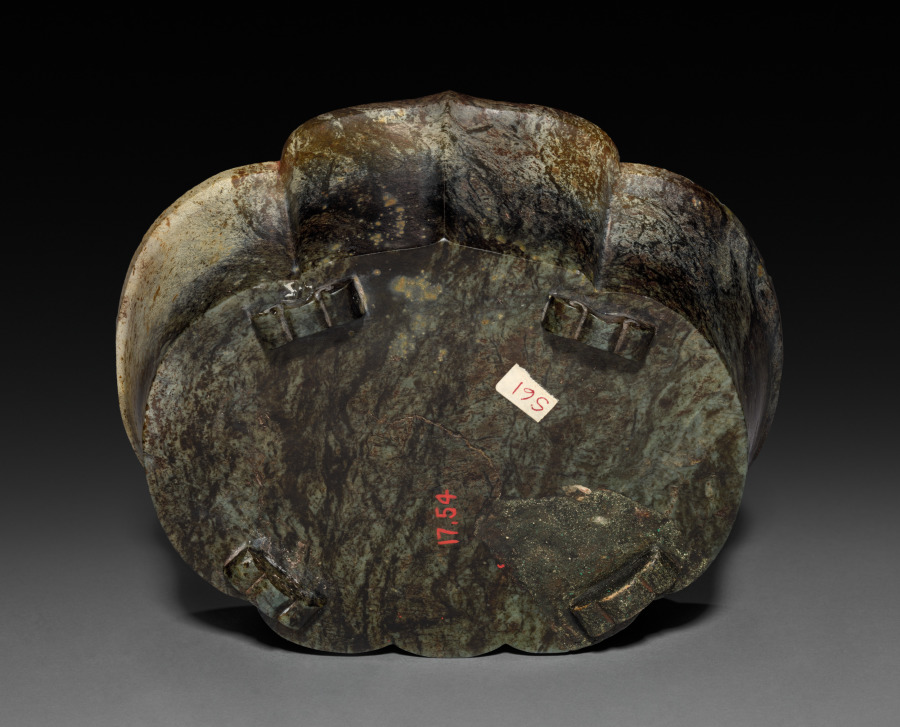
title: Fish Bowl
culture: China, Song dynasty (960-1279) or later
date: 960–1279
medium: jade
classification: Jade